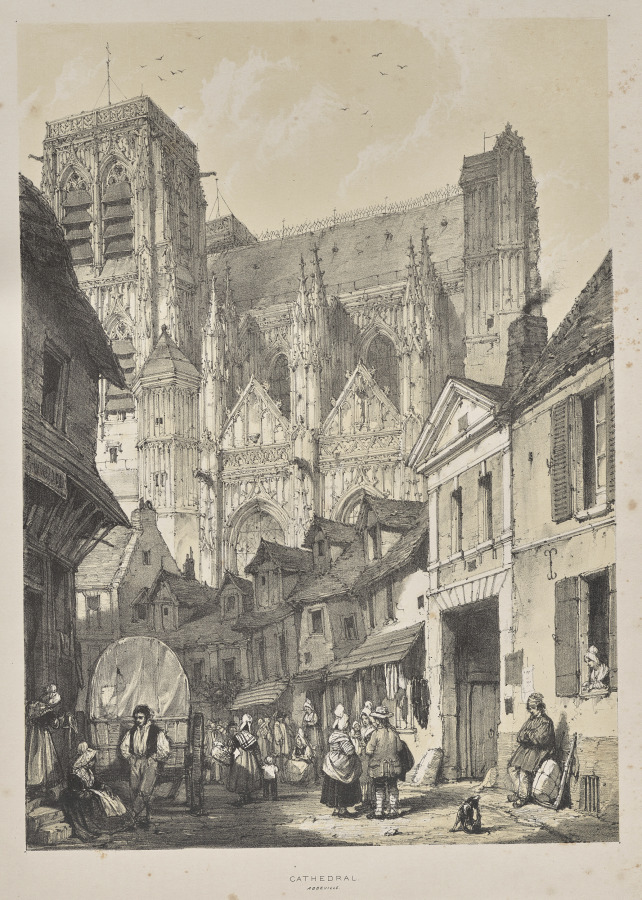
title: Architecture of the Middle Ages: Cathedral, Abbeville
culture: England, 19th century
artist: Joseph Nash (British, 1808–1878)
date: 1838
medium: lithograph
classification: Print